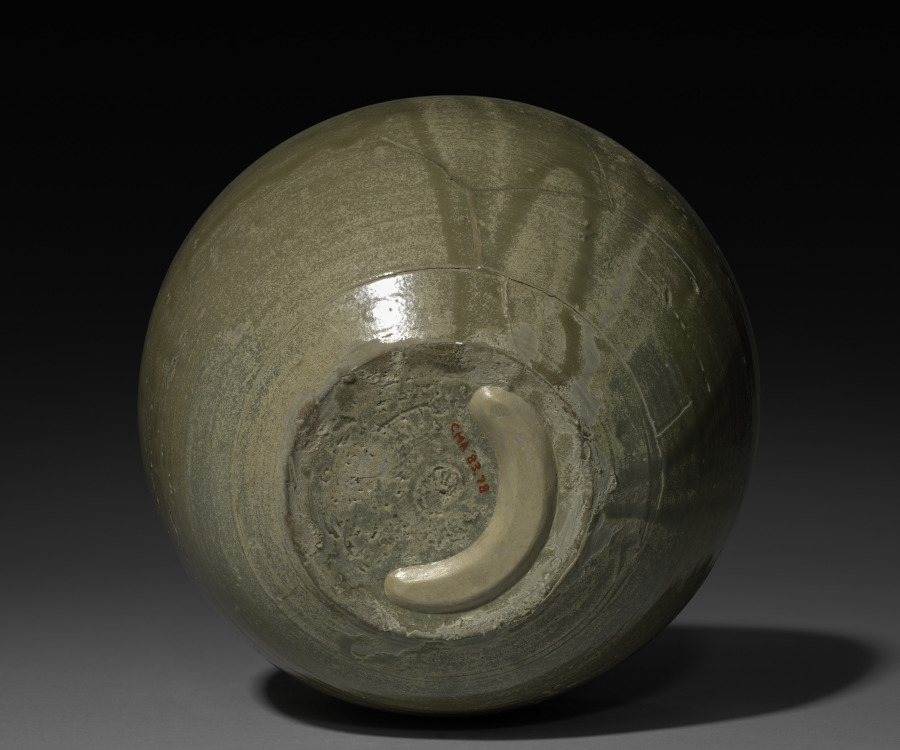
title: Jar with Handles: Yue ware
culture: China, Tang dynasty (618-907)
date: c. 800s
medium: gray stoneware with iron glaze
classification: Ceramic